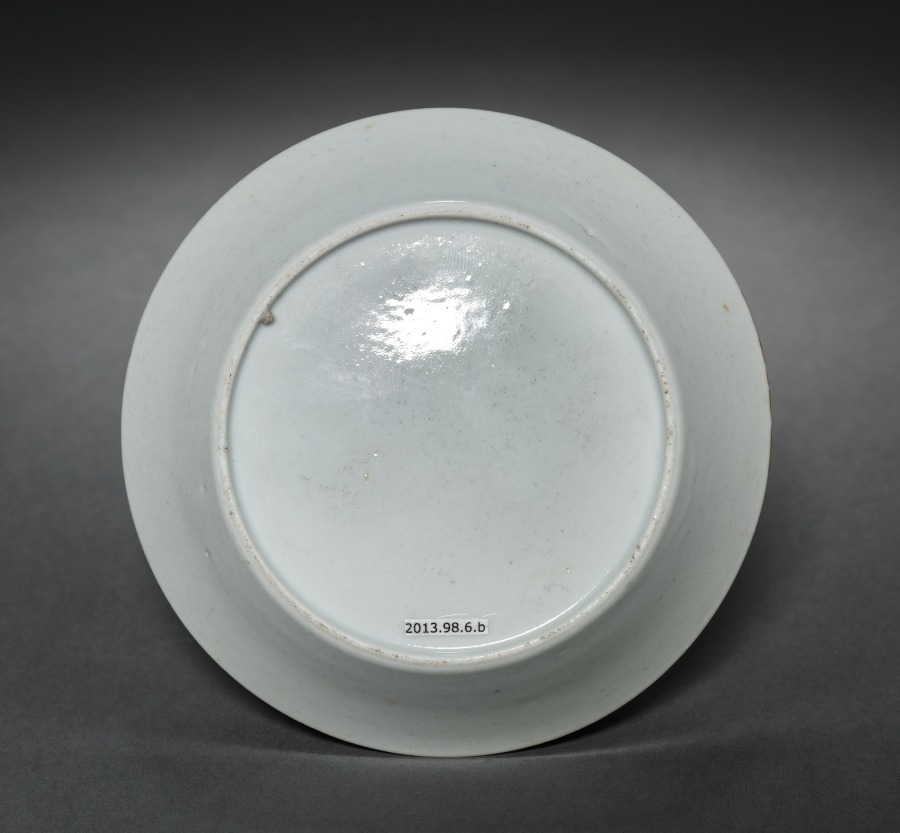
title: Saucer from Oliver Wolcott, Jr. Tea Service (6 of 6)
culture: Chinese Export porcelain, late 18th-early 19th century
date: 1785–1805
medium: porcelain, sepia enamel, gold leaf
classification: Ceramic